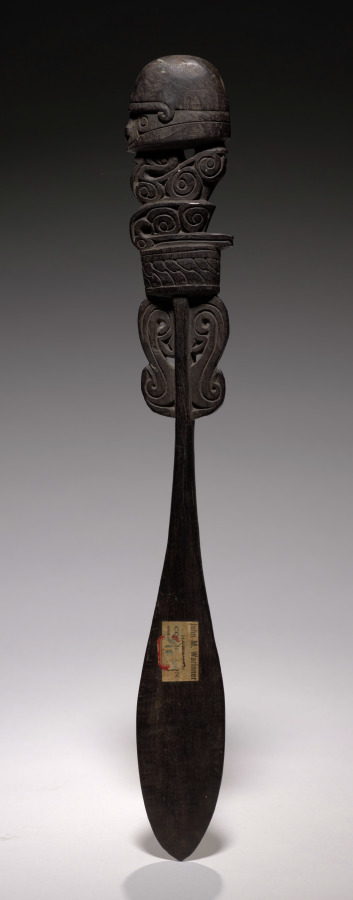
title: Lime Spatula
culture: Melanesia, New Guinea, Massim Area, Trobriand Islands, 20th century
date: before 1930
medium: wood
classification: Sculpture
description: Intricately carved spatulas (chunum) were used to remove a mixture of areca nut, lime, and betel pepper from gourd containers for chewing. The stylized human face and figure are decorated with lime-filled incised designs.